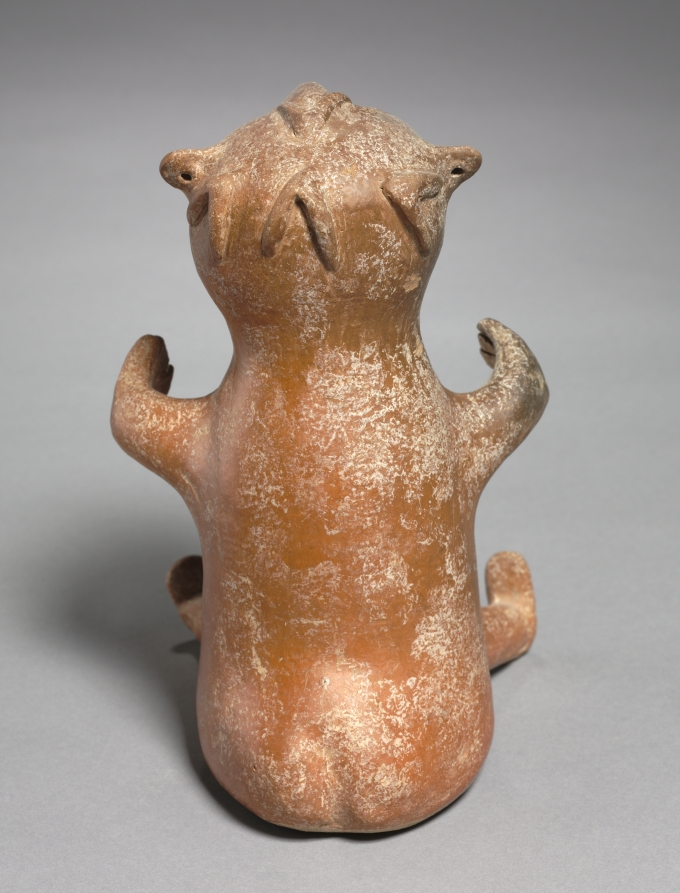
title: "Bear-Woman" Vessel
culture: Iran, Marlik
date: c. 1200–1000 BCE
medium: ceramic, earthenware, burnished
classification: Ceramic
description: The sexual features of this creature have been emphasized so as to guarantee fertility to the woman who drank from it.